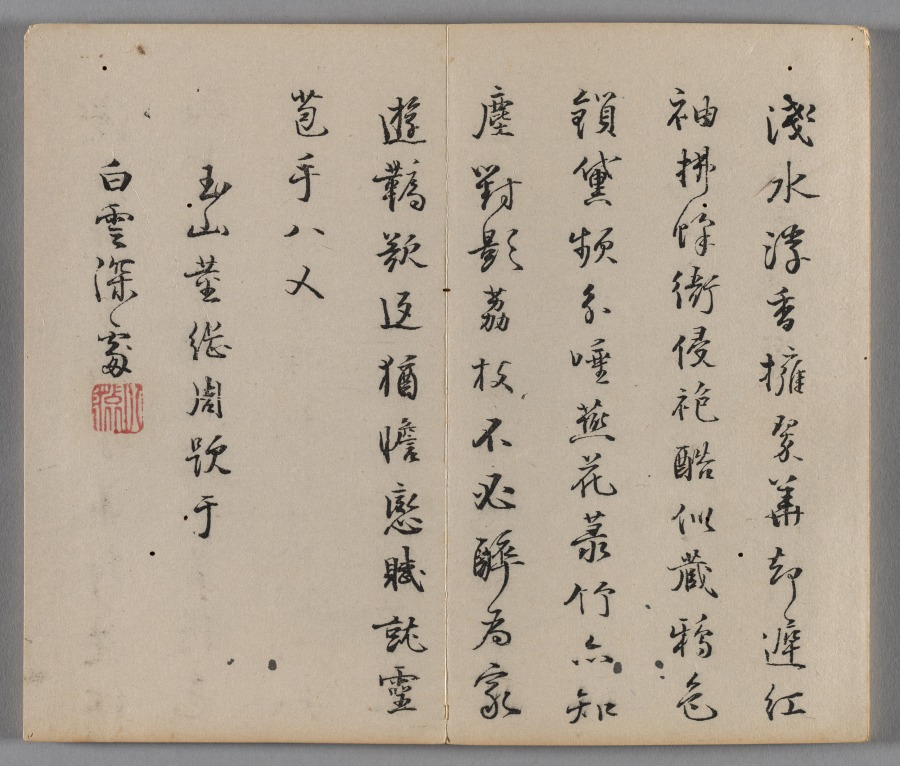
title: Ten Bamboo Studio Painting and Calligraphy Handbook (Shizhuzhai shuhua pu): Plum Blossoms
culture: China, Qing dynasty (1644-1911)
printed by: Hu Zhengyan (Chinese, c. 1584–1674)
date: 1633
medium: Woodblock-printed book; ink and colors on paper; first edition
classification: Print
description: Color printing reached a level of perfection in the early 1600s, as seen in this Ten Bamboo Studio Collection of Calligraphy and Painting and the Mustard Seed Garden Manual of Painting (printed 1679 and 1701). The painterly quality, precision in registering (aligning) the woodblocks, and harmonious colors made them the most successful color print editions in Chinese history. Both editions were printed and compiled in Nanjing, spread nationwide, and had a great impact on the arts in Japan and Korea.